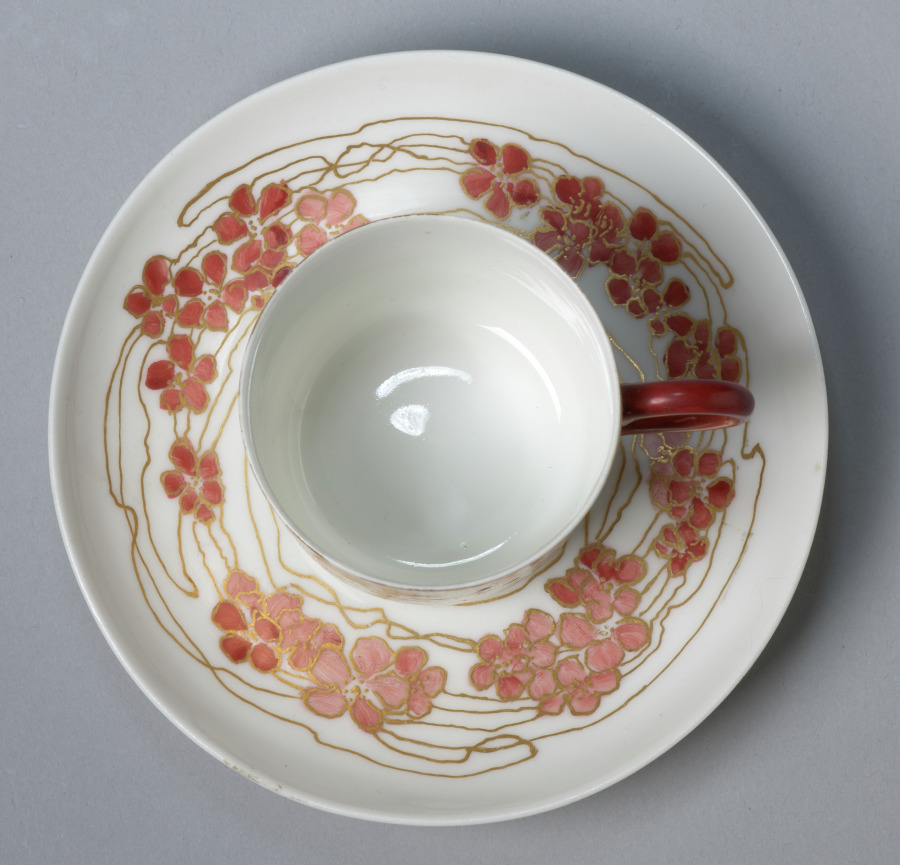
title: Cup and Saucer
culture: America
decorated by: M. Louise McLaughlin (American, 1847–1939)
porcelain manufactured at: Haviland & Co. (French)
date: 1888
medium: porcelain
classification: Ceramic